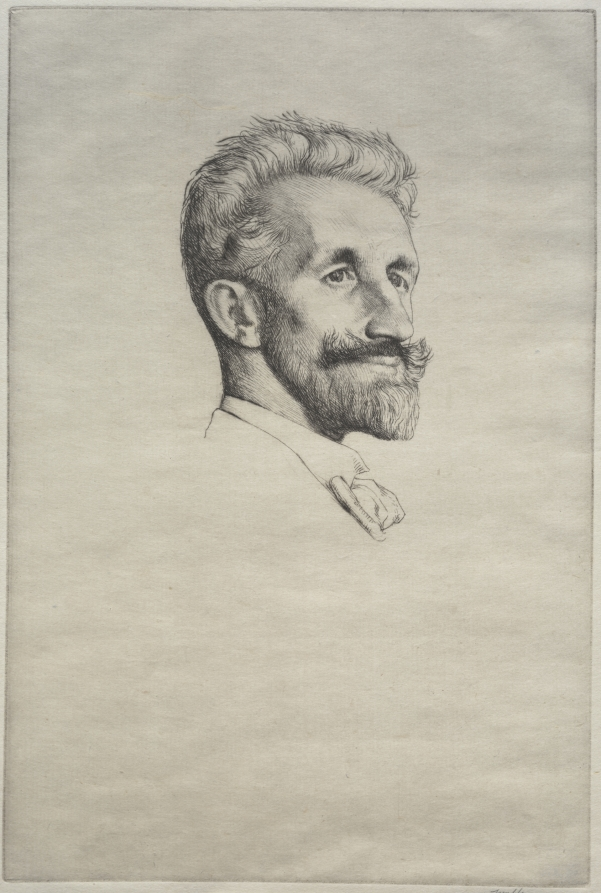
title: Robert Bontine Cunningham Graham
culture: England, late 19th Century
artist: William Strang (British, 1859–1921)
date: 1898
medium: etching and drypoint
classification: Print